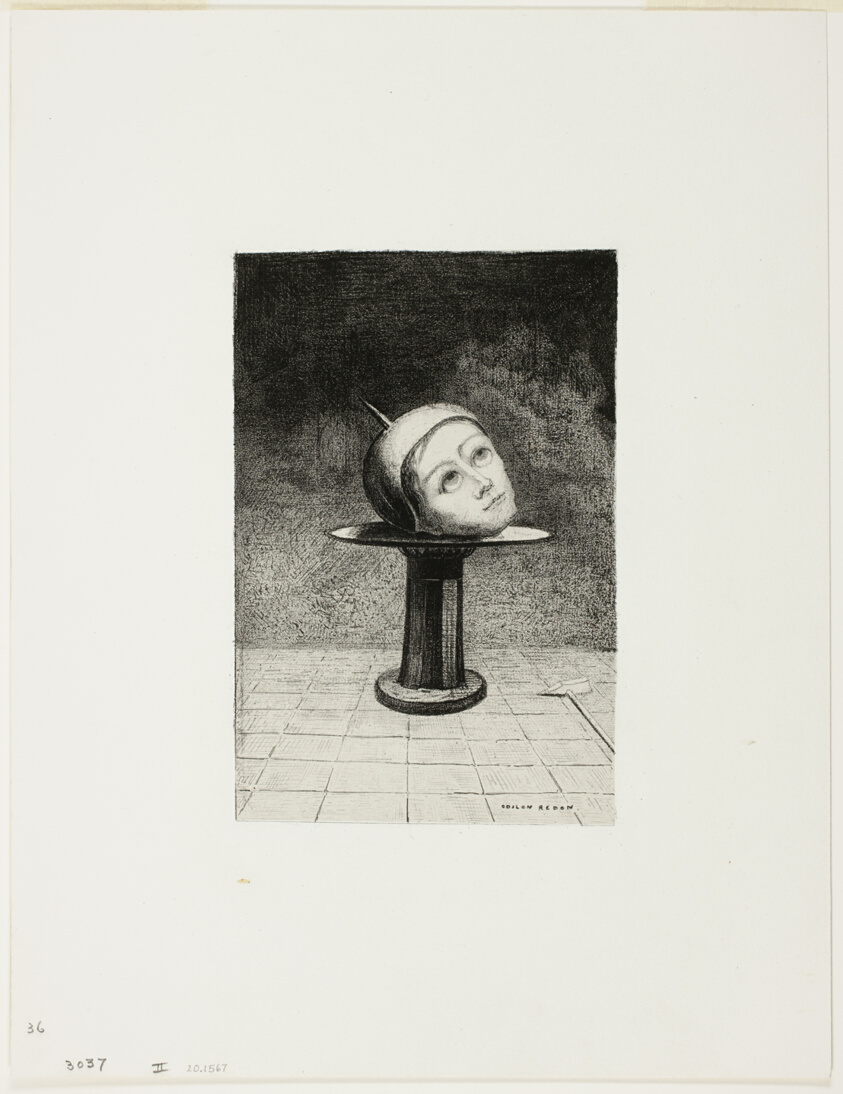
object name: Print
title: On the Dish, plate ten from In Dreams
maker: Odilon Redon (French, 1840-1916)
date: 1879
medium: Lithograph on mounted ivory China paper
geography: France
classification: lithograph; print; prints and drawing; paper